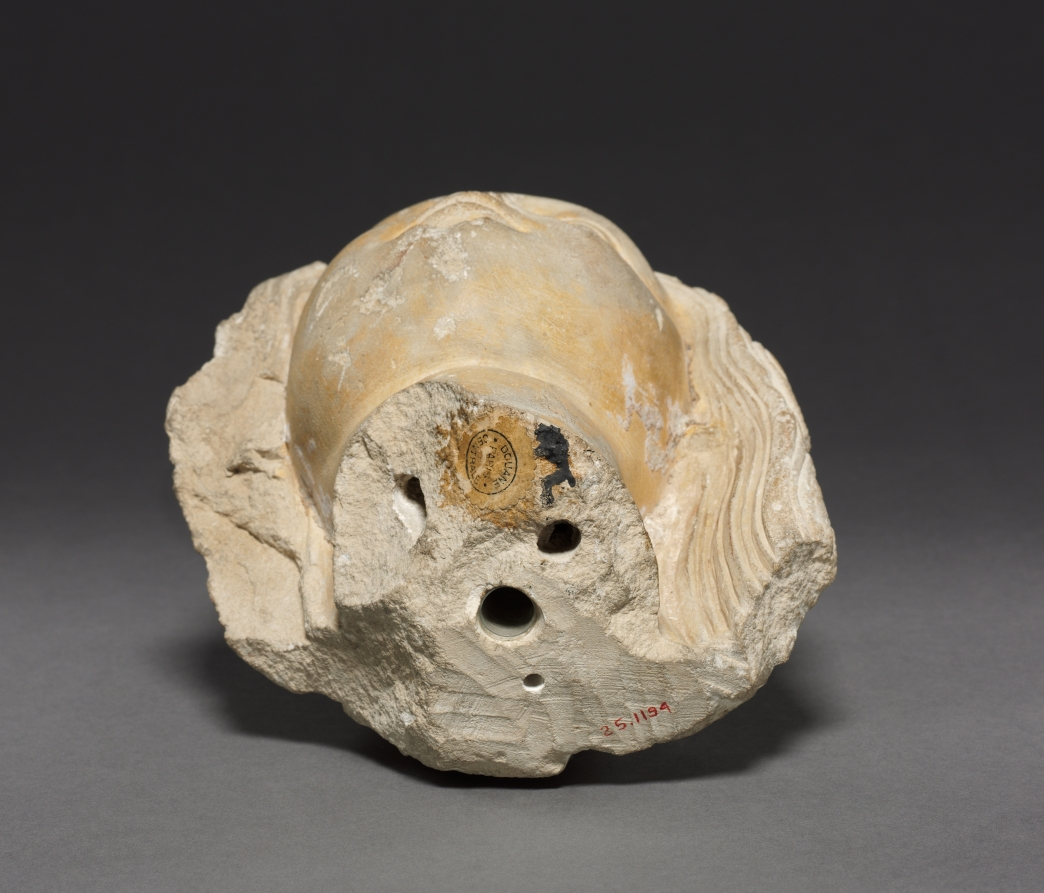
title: Crowned Female Head (Fragment)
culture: France, Champagne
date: c. 1400–1420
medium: limestone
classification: Sculpture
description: The origins of this sculptural fragment are not known. It is perhaps the final trace of the once beautiful figure of a standing Virgin and Child.